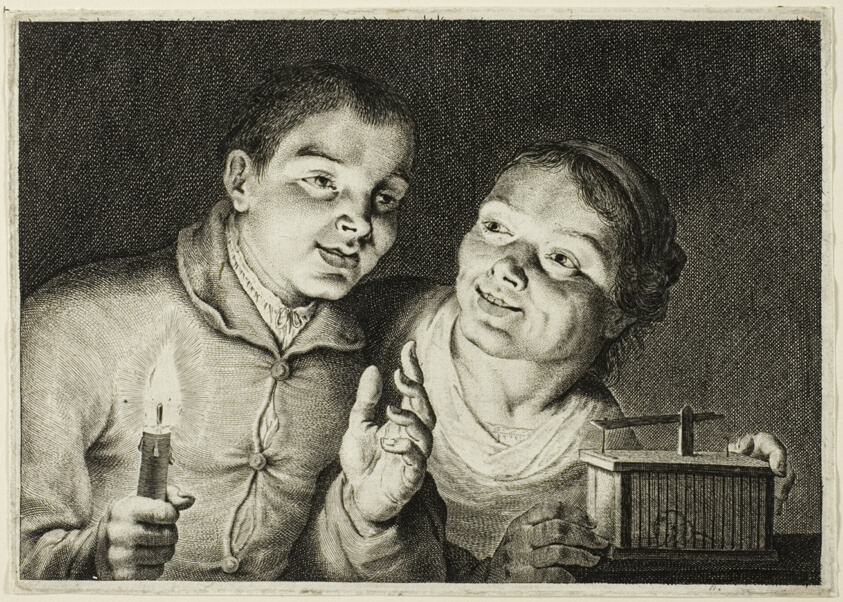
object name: Print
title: The Mousetrap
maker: Cornelis Visscher (Dutch, c. 1629-1658)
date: c. 1655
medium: Engraving on ivory laid paper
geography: Holland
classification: engraving; print; prints and drawing